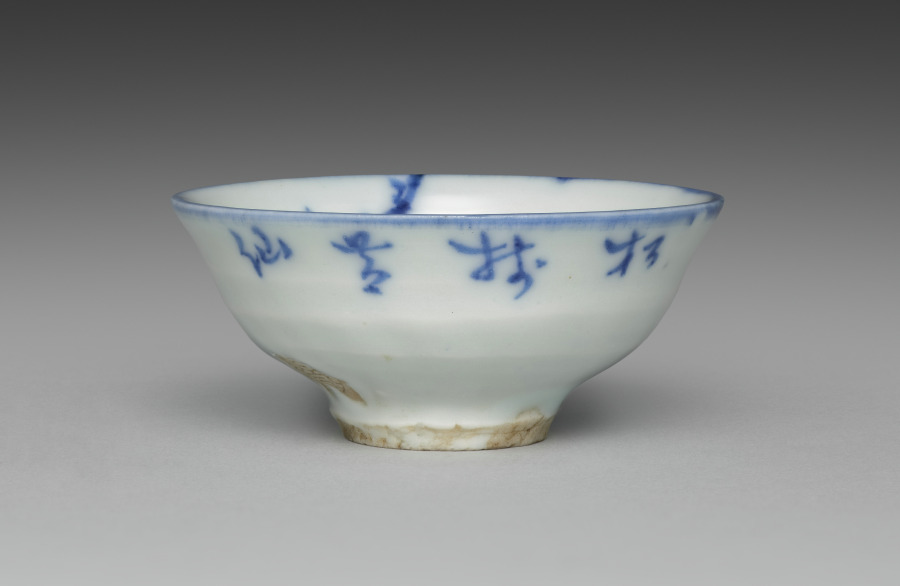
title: Sake Cup with Auspicious Plants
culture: Japan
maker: Seifū Yohei II (Japanese, 1844–1878)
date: 1861–78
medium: One of a pair of sake cups; porcelain with underglaze blue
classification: Ceramic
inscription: 松梅芝仙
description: Seifū Yohei II excelled as a painter, as evidenced by his floral and landscape designs. His works were selected as the best among Kyoto ceramics shown to jurists from Europe and the US, thus paving the way for international recognition of the studio in the late 1800s.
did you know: The plum and the pine are two of the "Three Friends of Winter," auspicious symbols of a cultured scholar's virtues: steadfastness, resilience, and flexibility.